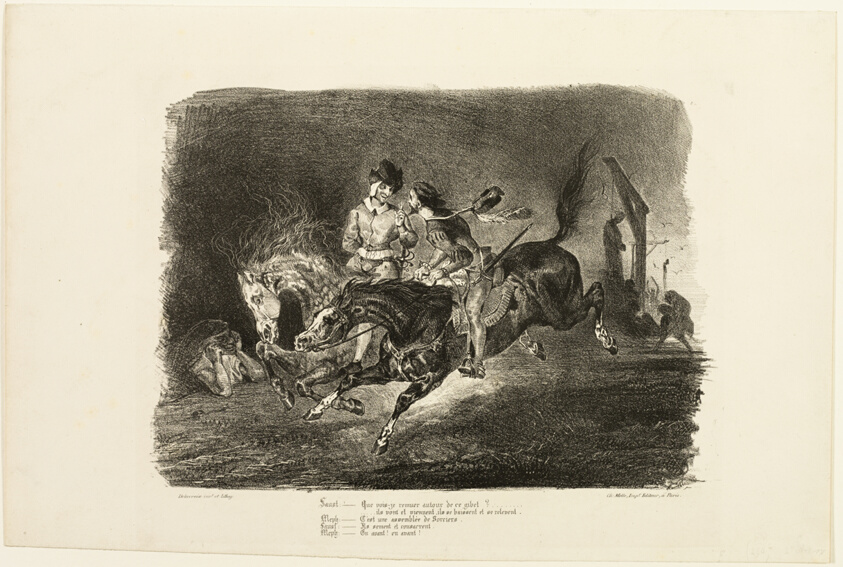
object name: Print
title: Faust and Mephistopheles Galloping Through the Night of the Witches' Sabbath, from Faust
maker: Eugène Delacroix (French, 1798-1863)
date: 1828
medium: Lithograph in black on ivory wove paper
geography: France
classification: lithograph; print; prints and drawing